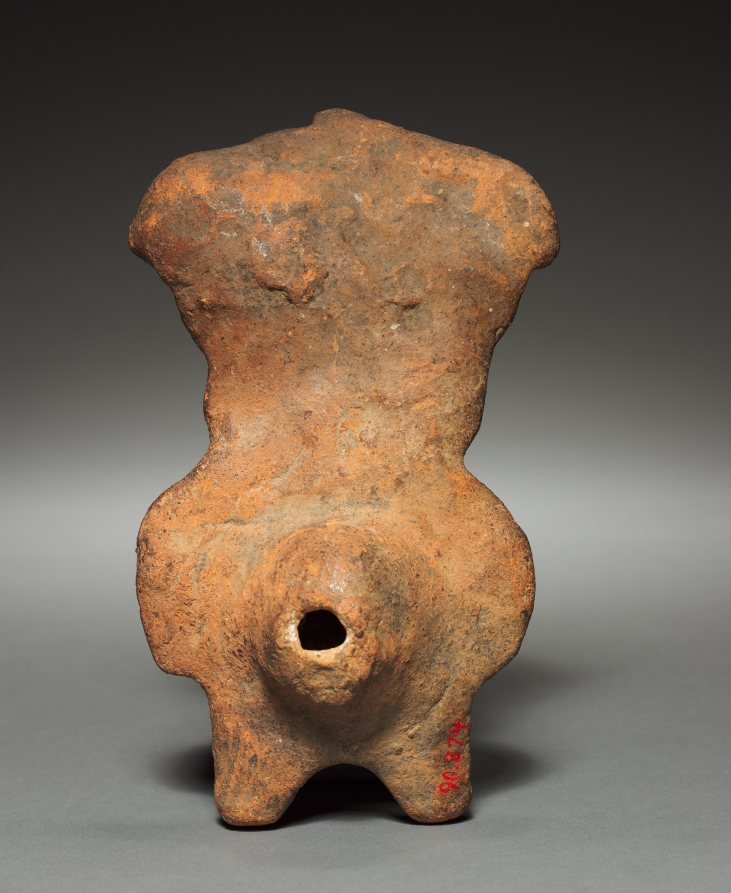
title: Whistle Figure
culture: Mexico, Oaxaca, Zapotec, Monte Albáb IIIB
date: 500–1000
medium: molded pottery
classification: Sculpture